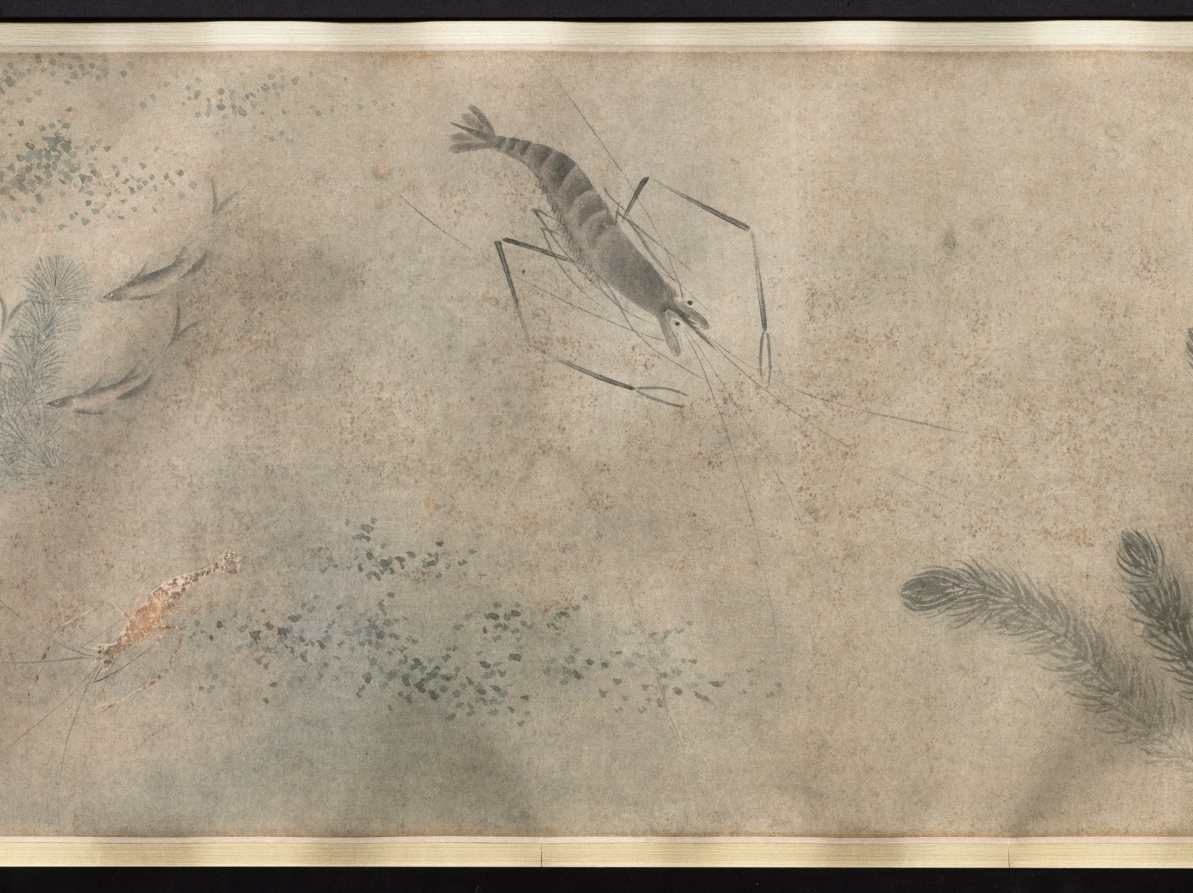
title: Insects and Flowers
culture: China, Qing dynasty (1644-1911) or Republican period (1912-49)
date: c. 1900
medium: Handscroll, ink and color on paper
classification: Painting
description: More than 26 feet long, this scroll presents insects, reptiles, and plants in delicate brushwork and pale colors, referring in style to earlier Southern Song dynasty (1127–1279) bird-and-flower paintings. Upon closer inspection, ants dismember a butterfly and reptiles wait to ambush their prey. An inscription at the end of the painting gives us an idea of its meaning: Attributed to the Qing dynasty scholar Zhang Xigeng (張錫庚, 1801–1861), the inscriber relates the work to an earlier painting by Qian Xuan (錢選, c. 1235–before 1307) and further suggests that the painting may allude to the relentlessness of natural selection. By drawing a parallel to tumultuous episodes in Chinese history, the writer might even hint at the domestic rebellions and the aggression of Western powers against China in his lifetime, particularly the Opium Wars (1839–60).